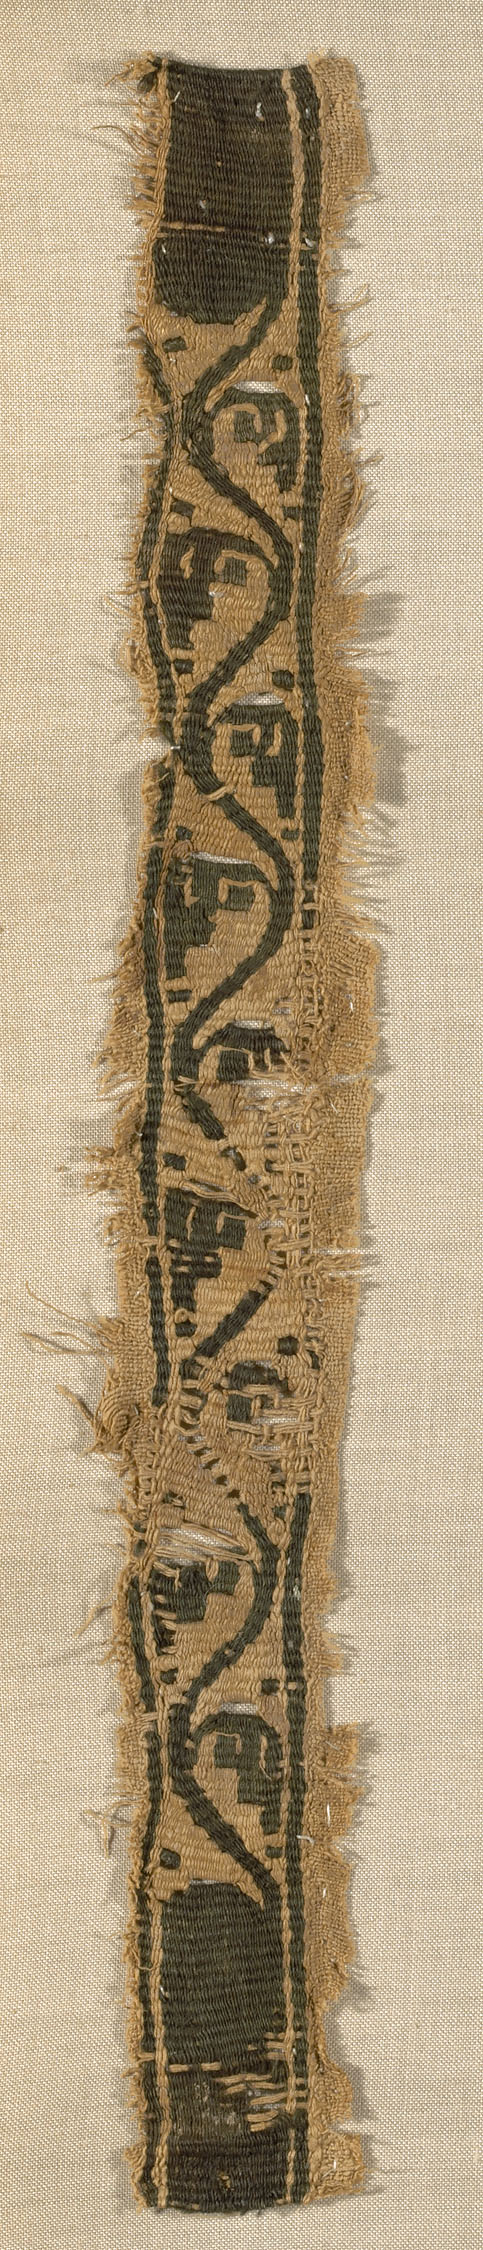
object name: Textile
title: Fragment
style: greco-roman (egyptian)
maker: Coptic (Egypt, Akhmin)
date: Greco–Roman period (30 B.C.– 641 A.D.), 4th/5th century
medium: Linen and wool, slit tapestry weave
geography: Egypt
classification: textile; weaving